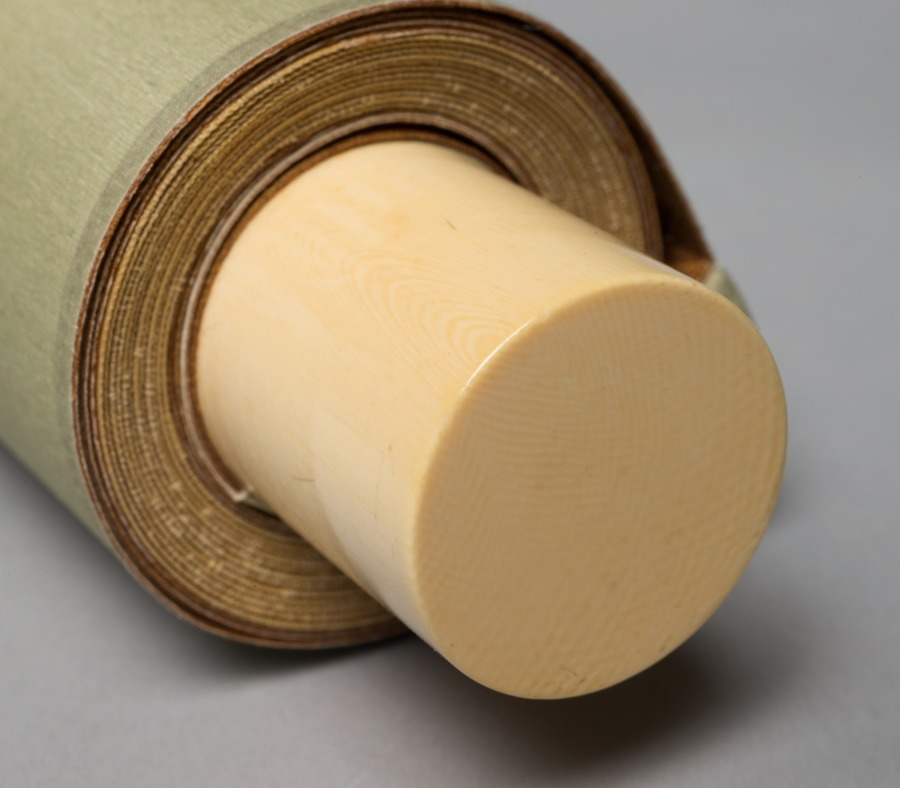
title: Prunus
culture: Japan, Edo period (1615–1868)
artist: attributed to Kano Einō (Japanese, 1631–1697)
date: mid- to late 1600s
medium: hanging scroll; ink on paper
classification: Painting